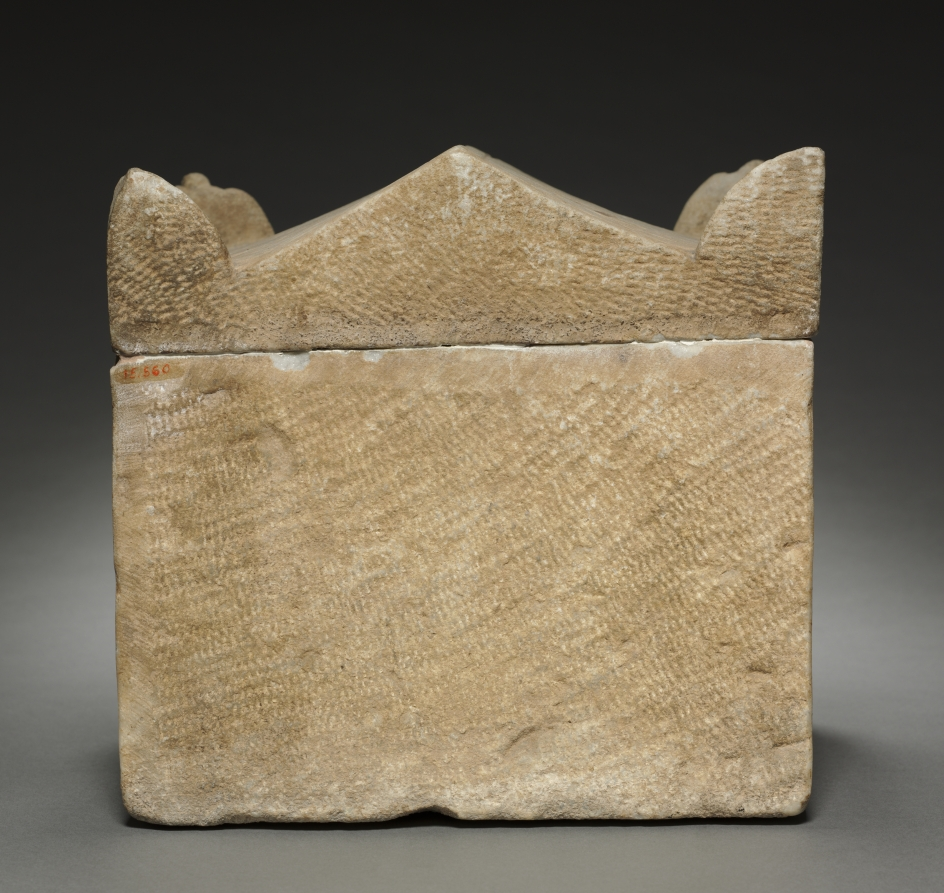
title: Cinerary Box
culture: Italy, Roman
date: 1–100 CE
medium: marble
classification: Sculpture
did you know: The central rectangular plaque would have been inscribed with an epitaph, either painted or carved.